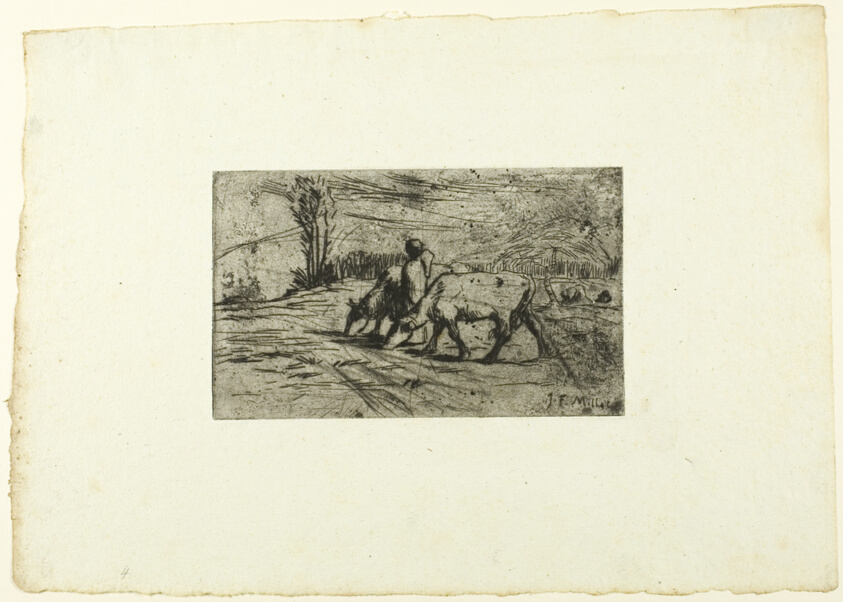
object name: Print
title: The Two Cows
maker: Jean François Millet (French, 1814-1875)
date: c. 1847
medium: Etching, drypoint and roulette with foul biting on ivory laid paper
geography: France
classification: etching; print; prints and drawing